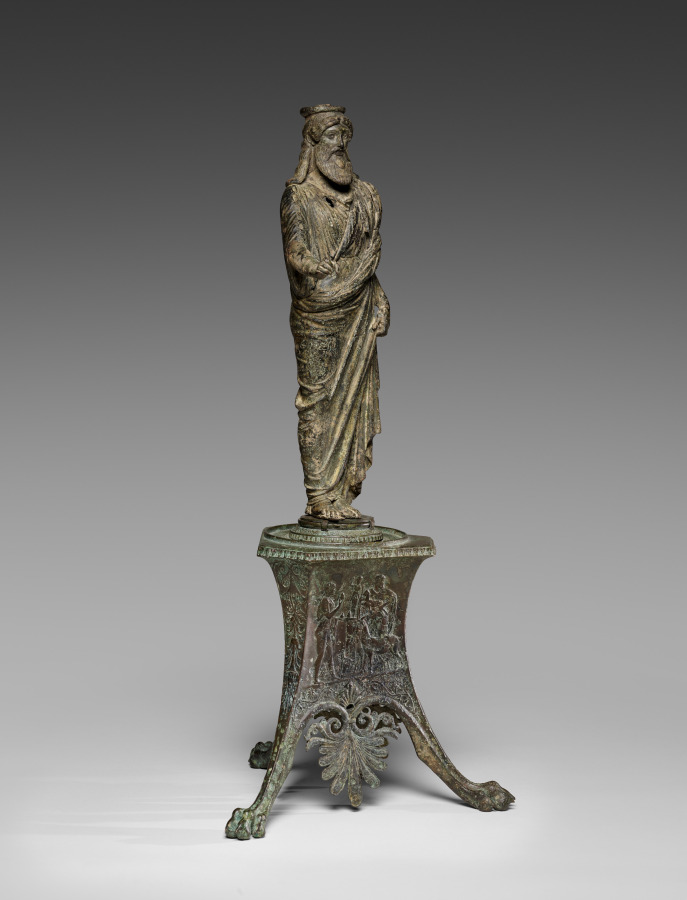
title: Tripod Base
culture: Italy, Roman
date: 100–1 BCE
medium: bronze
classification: Sculpture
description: This unusual tripod base features three clawed feet, an abundance of vegetal ornament, and three different figural scenes in low relief. Two seem to show sanctuary settings: first, a small Archaistic statue of Athena flanked by a woman with small offerings and a man holding a kid and leading two goats; and second, a small youthful male statue behind two beardless figures—perhaps Apollo, with a stag, and Dionysos, holding a thyrsos. The third scene shows Herakles, holding a club while leading a woman, maybe Auge or Alcestis. Although perhaps similarly eclectic in style, the base and the sculpture it now supports differ in their alloys and patinas.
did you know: This elaborate base may have originally supported an ornate lamp (not the statuette now displayed atop it).